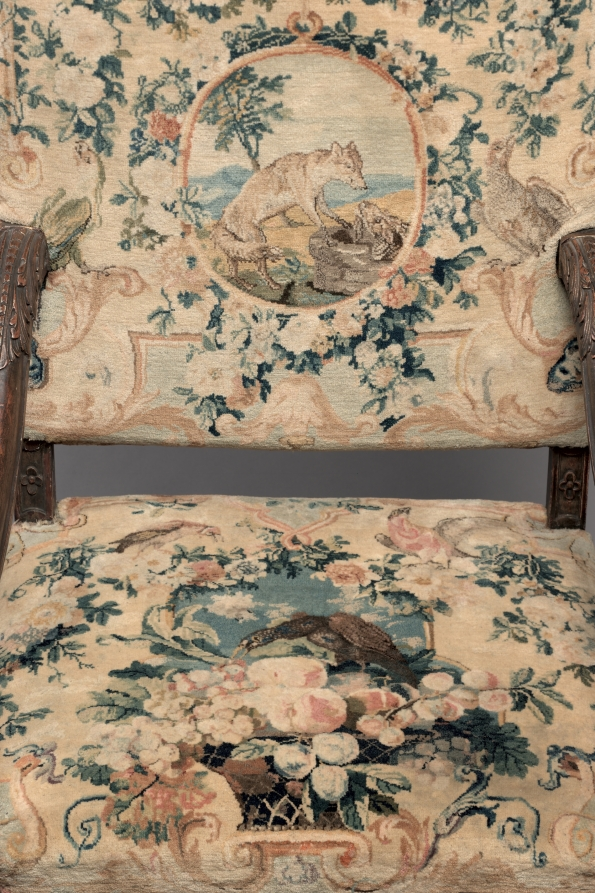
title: Armchair (2 of 4)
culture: France, 18th century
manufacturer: Royal Savonnerie Manufactory, Chaillot Workshops (French, est. 1627)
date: before 1717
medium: carved wood, Savonnerie knotted-pile (symmertrical rug knot) upholstery; wool, hemp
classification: Furniture and woodwork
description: These chairs belong to a suite that includes a settee (also in the CMA’s collection) and a tapestry made for a count and countess to mark their wedding in 1717. Furniture of this scale was usually placed against the wall in grand reception halls, more as a display of wealth than for use. Upholstered in Savonnerie tapestries, this suite was among the most treasured and expensive example anyone could own and typically reserved for royalty. To add decorative and intellectual interest to the textiles, weavers incorporated symbols depicting various stories from the Fables of Jean de La Fontaine, published from 1668 to 1694 and largely adapted from Aesop and other early storytellers.